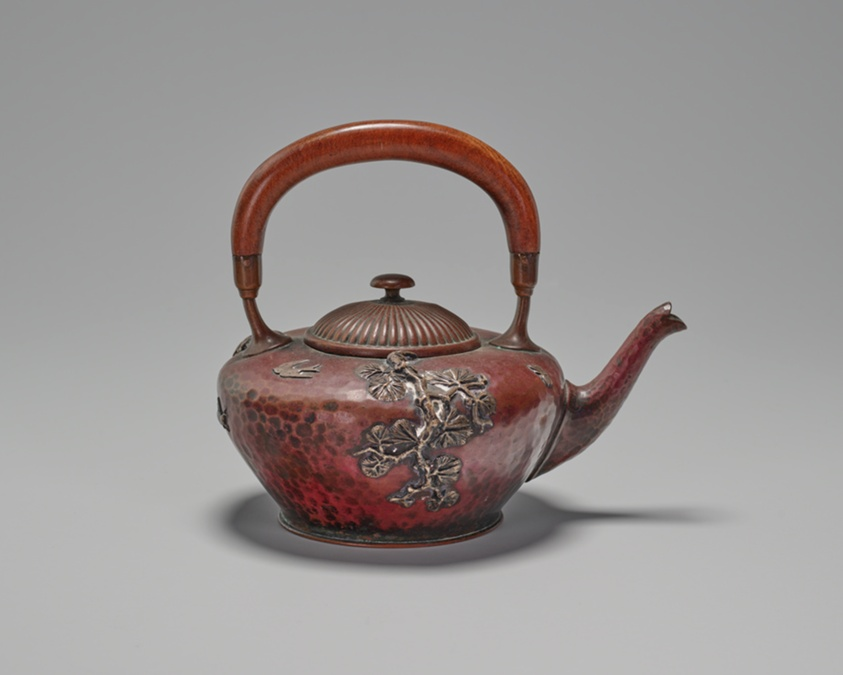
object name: Decorative Arts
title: Tea Kettle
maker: Gorham Manufacturing Company (American, founded 1831); Providence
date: c. 1900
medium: Copper, mixed metals, and wood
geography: Providence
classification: american decorative arts; decorative arts